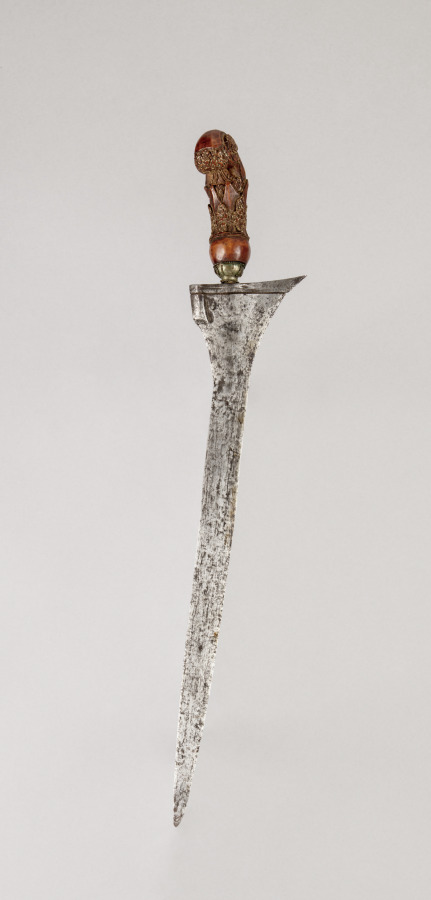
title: Sword (Kris)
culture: Java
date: 1800s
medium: iron with carved wooden handle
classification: Arms and Armor